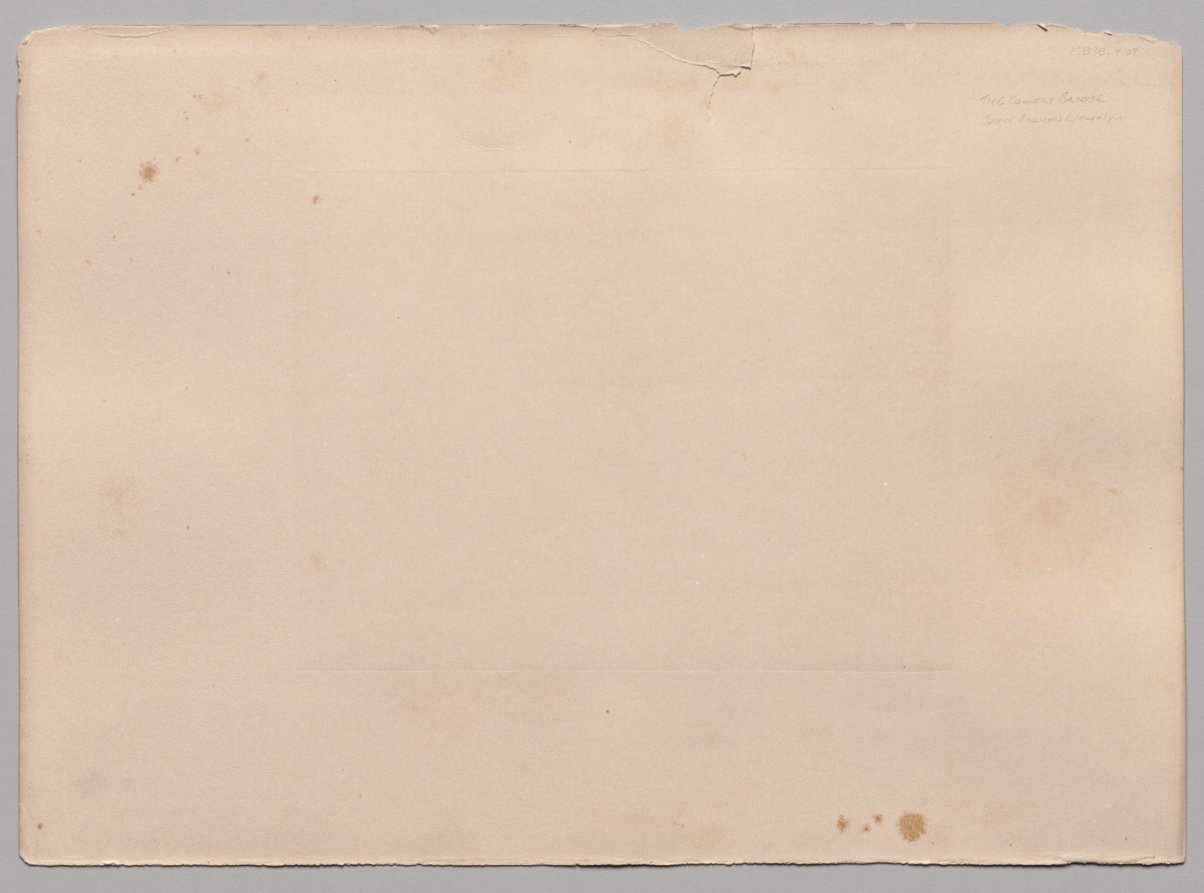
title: The Country Bridge (Staplylton Bridge, Bristol)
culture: England, 19th century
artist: John Dillwyn Llewelyn (British, 1810–1882)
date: c. 1854– 1857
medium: albumen print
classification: Photograph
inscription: written in pencil on verso of mount: "13838-4.09/The Country Bridge/John Dillwyn Llewelyn"